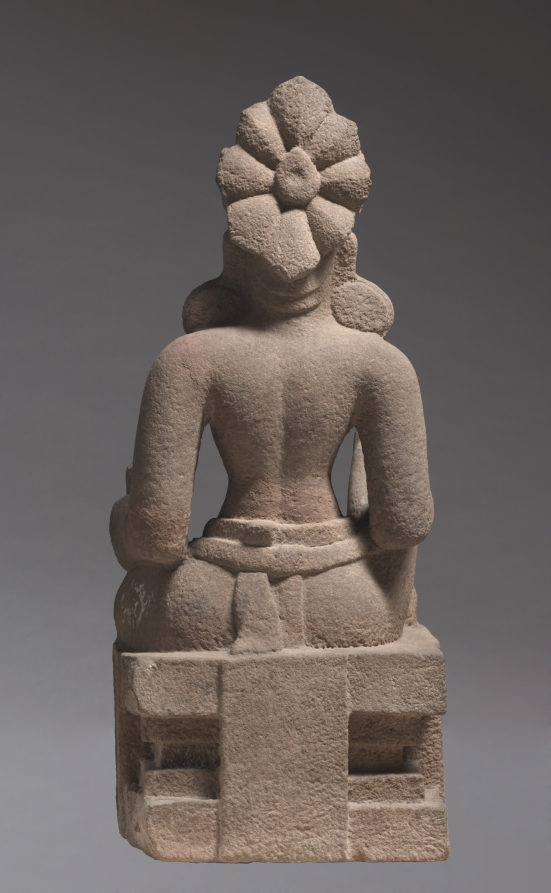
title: Enthroned planetary deity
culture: Central Vietnam (Champa), Quang Nam province, Dong Duong monastery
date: 850–75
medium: Sandstone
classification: Sculpture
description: Enthroned Planetary Deity is a powerful presence about three feet tall, made of a light-colored sandstone. He is a personification of one of the nine planets that protected a Buddhist temple; the short dagger in his left hand along with the mustache and stylized furrowed brow refer to his role as a fierce protector. His posture is that of royal ease, and his crown, massive earrings, and throne also mark him as a king of the heavens. The mark on his forehead refers to his association with enlightened beings. The meaning of a planetary deity as a guardian pertains to the consecration of the temple at a time when the planets were correctly aligned with the stars, so that the site and devotees will be protected from misfortune. The “face of glory” (kirtimukha) on the carved relief panel in front of his pedestal is an image pertaining to the creative energy (shakti) that is emitted from the temple itself; it spits jewels and vegetal motifs that connote abundance and prosperity that will accrue to the worshipers who come to the temple. This sculpture is one of the rare surviving examples from the Cham culture of central and southern Vietnam. It is documented to have come from the Dong Duong monastery, dedicated to Mahayana Buddhism.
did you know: Sanskrit dedicatory inscriptions show that the temple and monastery complex at Dong Duong founded in 875.